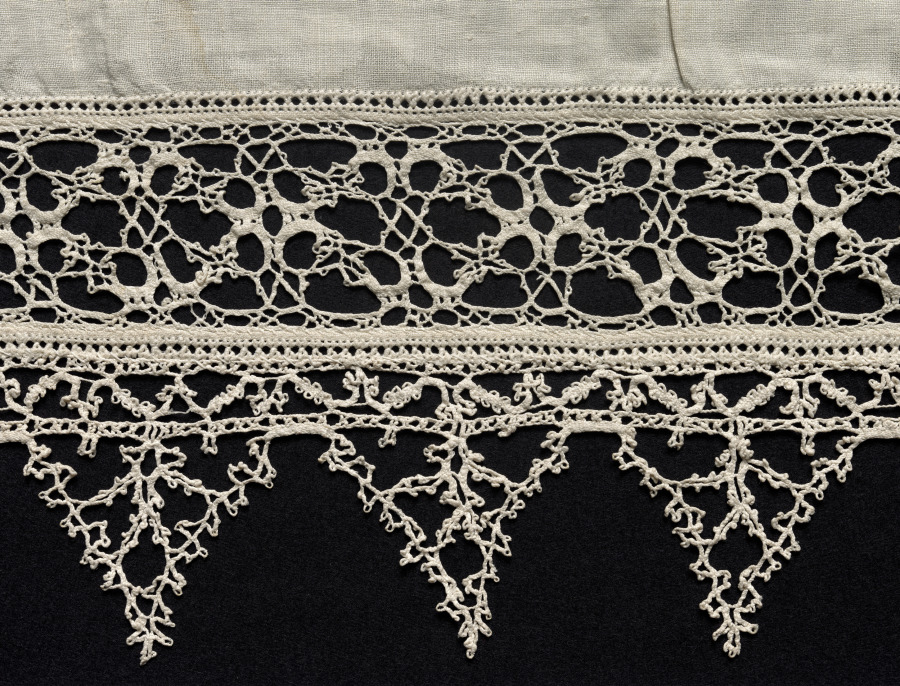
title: Lace Cloth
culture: Italy, Venice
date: 1540–60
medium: Bobbin lace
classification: Lace